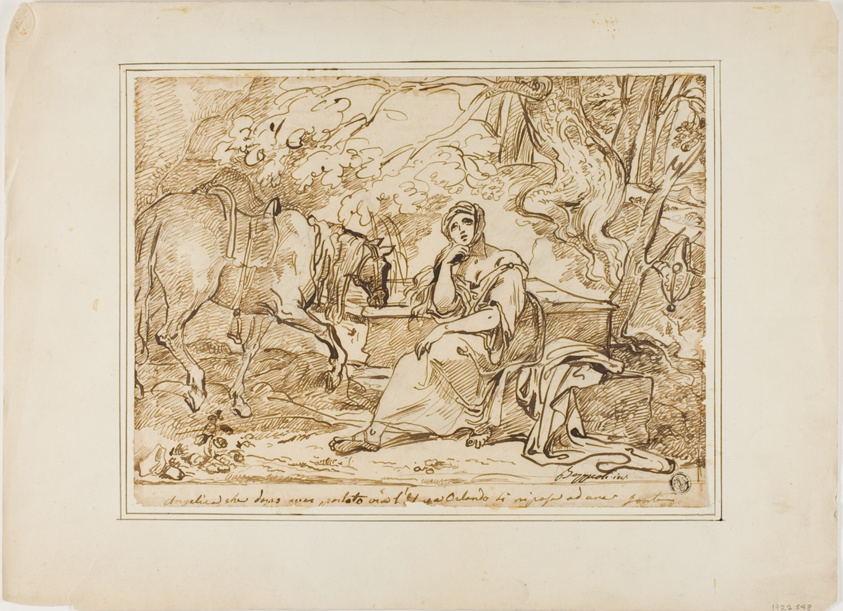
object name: Drawing and Watercolor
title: Angelica Resting at a Fountain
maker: Giuseppe Bezzuoli (Italian, 1784-1855)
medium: Pen and brown ink, over traces of graphite, on cream laid paper, laid down on ivory wove paper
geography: Italy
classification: pen and ink drawings; paper; drawings (visual works); prints and drawing